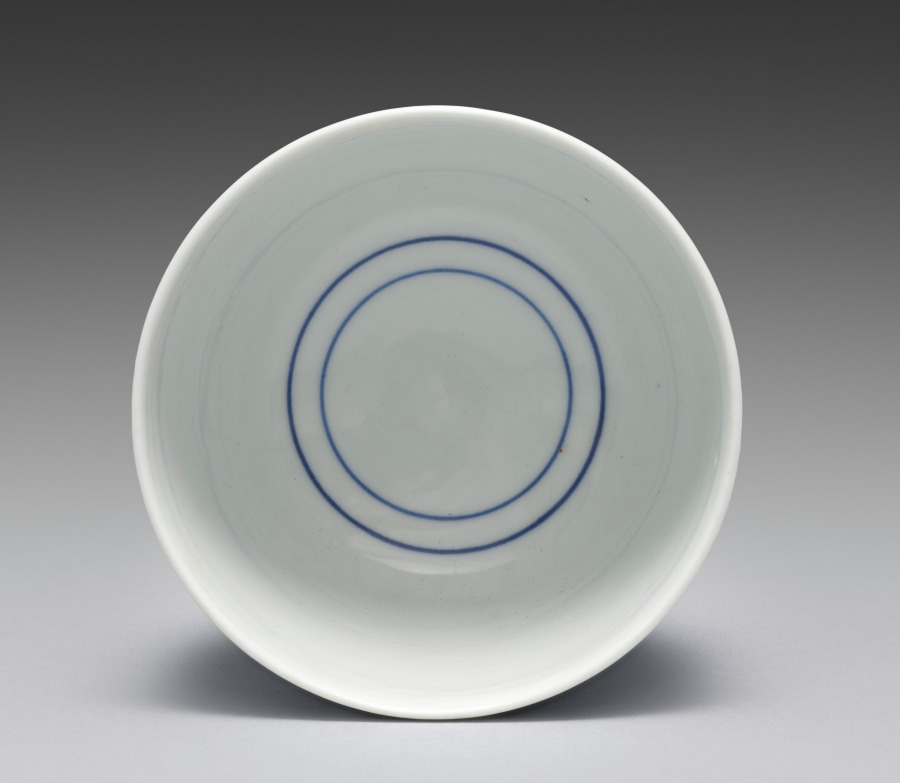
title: Teacup from Teacups with a Hundred Sages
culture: Japan, Meiji period (1868–1912)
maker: Seifū Yohei III (Japanese, 1851–1914)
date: 1893–1914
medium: One from a set of five teacups; porcelain with underglaze blue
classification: Ceramic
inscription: 清風造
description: Each of these five teacups has a painting of identical design in underglaze blue, but as the tiny figures are drawn entirely by hand, each cup has its own personality. The theme of the sencha cups is an assembly of sages or immortals, literally “a hundred venerable [people]” (hyakurō). The myriad figures crowd the scene in groups. The god of longevity, with his tall forehead, sits with his cranes, having flown in from Mt. Penglai on the Isle of the Immortals. Seven long-bearded sages sit around a stone table, chatting and drinking; one is seated on an enormous gourd. Of course, there is a stack of books on the table, and elsewhere, scrolls are being written upon or read—in one case held very close by a sage who is wearing glasses. The design was enormously popular in ceramics made for those engaged in literati culture.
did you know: Seifū Yohei III (1851–1914) produced many works for tea gatherings where people drank Chinese-style leaf-tea (sencha).